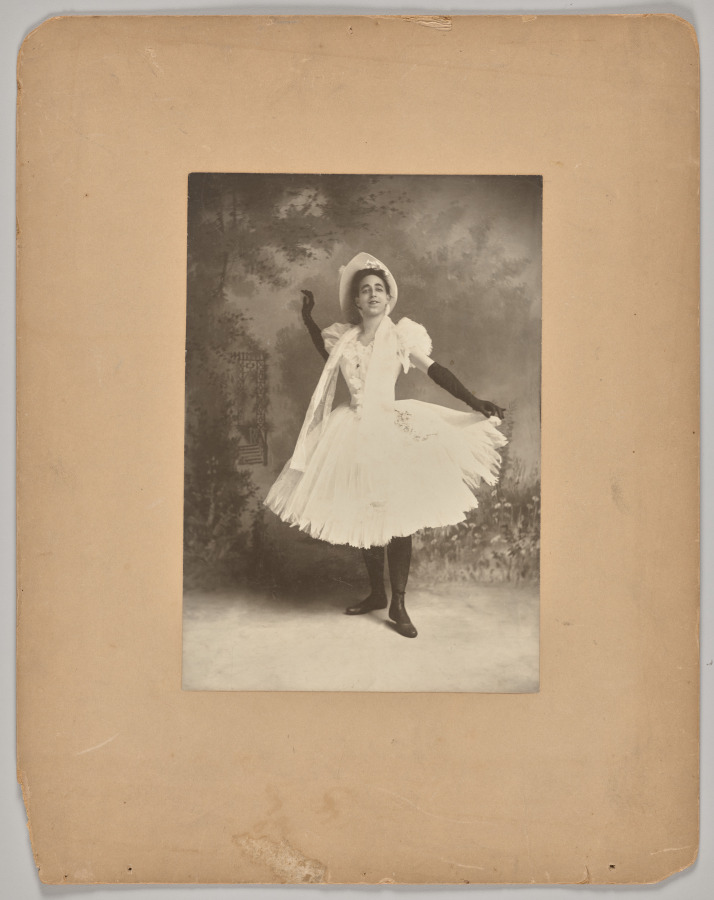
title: Untitled (man posing as a ballerina)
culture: America or England, 19th century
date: 1870s-1880s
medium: woodburytype or gelatin silver print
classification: Photograph